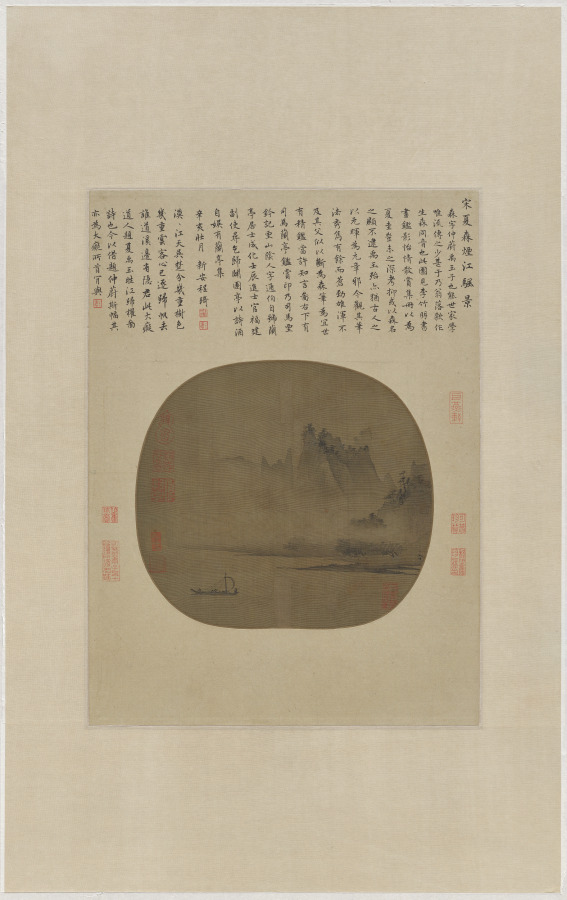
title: Full Sail on the Misty River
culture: China, Southern Song dynasty (1127-1279)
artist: assisted by Xia Sheng (Chinese, active 1200s)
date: 1200s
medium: Fan painting; ink on silk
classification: Painting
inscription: Artist's signature: Xia Sheng 夏生